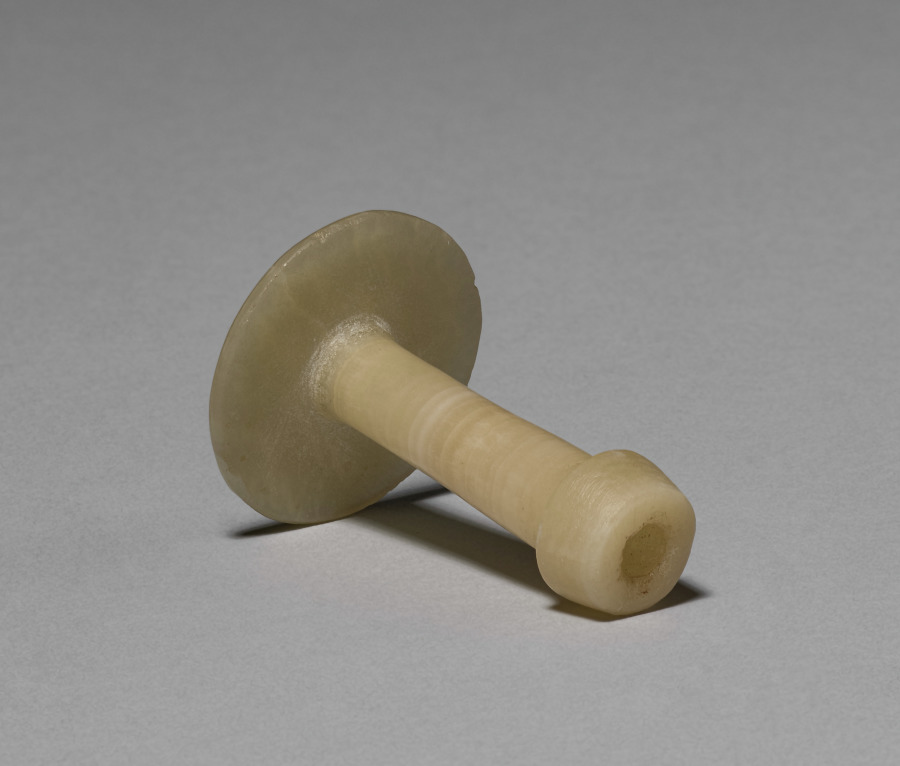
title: Alabastron (stopper)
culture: Egypt, Greco-Roman period (332 BCE–395 CE), Ptolemaic dynasty (305–30 BCE)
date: 305–222 BCE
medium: travertine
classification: Vessels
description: Both ancient Egyptian men and women loved cosmetics. Unguents, oils, and perfumes made from aromatic plant resins and gums were obtained at great cost from distant lands. The objects identified with cosmetics were given lavish treatment.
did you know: This is the lid to a perfume holder which might have been attached to a string, making it easily portable.